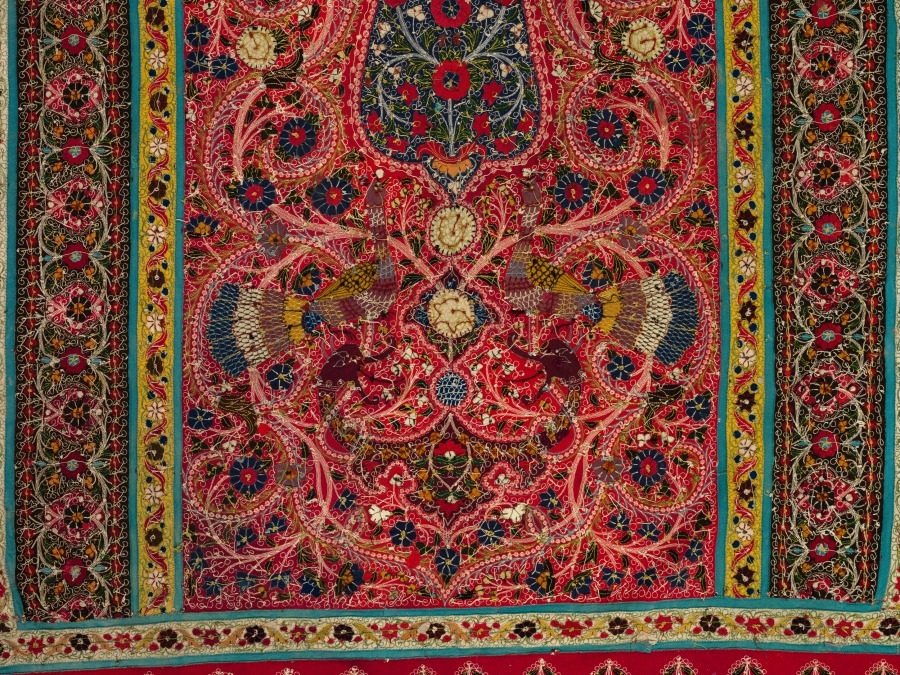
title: Tent Wall Panel(?)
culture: Iran, Rasht, Qajar period (1779-1925)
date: 1800s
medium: Wool: inlaid work; silk: embroidery, chain stitch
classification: Embroidery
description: Elaborate arched panels with multiple borders similar to this textile formed the mosaic-like interior walls of imperial tents. Here, the field is dominated by a richly decorated cypress tree above peacocks and dragon heads on an ornate foliate ground. We look upon the gardenscape through a niche (mihrab) formed by this foliage. Bright white silk “pearl” outlines, vines, and ringlets in chain-stitch embroidery enliven the pattern on contrasting colors of fulled wool. Internationally fashionable botehs, or paisleys, decorate the outer red borders.This technique has been referred to by many different names including: Rasht work, Resht work, Rashti-duzi, Rachti-douzi, embroidery applique, mosaic embroidery, piecework, patchwork, embroidery brocade, and inlaid patchwork. Many of these terms are to various degrees inaccurate descriptions of this technique. Perhaps the most practical term is Rasht work, named for the town in Iran where the technique was popularized. It begins as a ground of felted plain weave wool. Desired shapes are then punched out of the ground with a metal die and hammer. The same is done with wool of an alternating color. The edges of the different cut pieces are then embroidered together into various designs using a silk chain stitch (golab-duzi). Although this piecework technique was recorded in Iran in the 1670s, most examples survive from the 19th century, when foreigners praised them as “really [the] most beautiful embroidery.” The technique appears in furnishing fabrics, and horse covers, as well as imperial portraits, including one depicting the Qajar monarch Fath ‘Ali Shah, who ruled in 1797–1837. Sometime after leaving the workshop this panel experienced moth damage; small patches can be seen throughout.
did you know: Generally, Rasht work was made by men. Boys handled the delicate embroidering while older men designed cartoons and punched the wool designs.